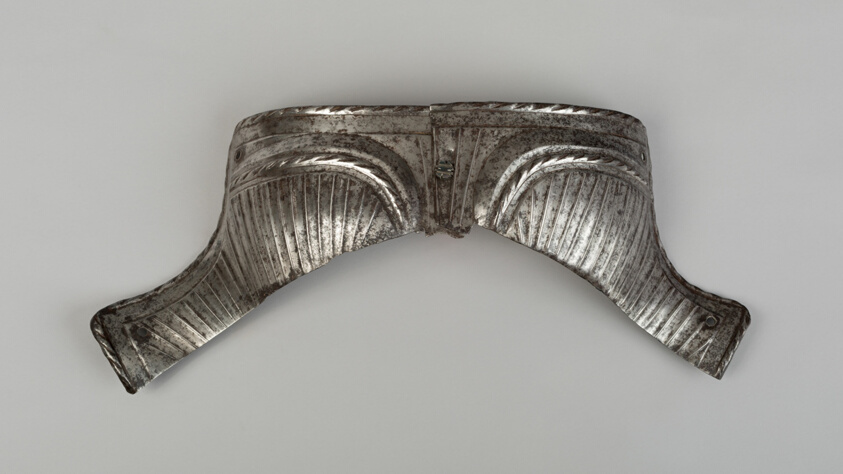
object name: Armor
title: Cantle Plate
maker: German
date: c. 1520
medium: Steel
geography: Germany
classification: horse equipment; armor; arms and armor